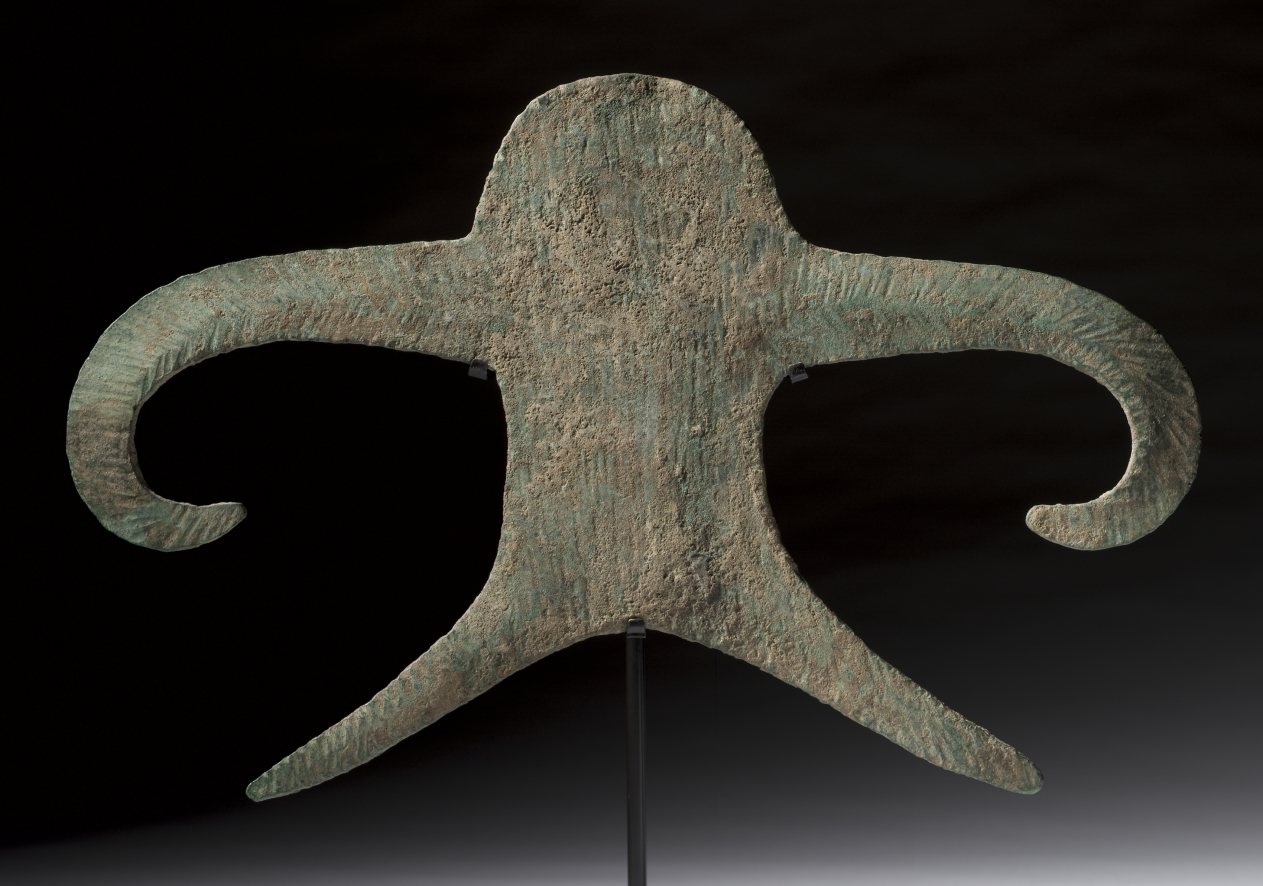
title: Anthropomorph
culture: India, Bronze Age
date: c. 1500–1000 BCE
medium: copper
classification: Sculpture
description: Among the few works of art known from the first millennium BC in India, anthropomorphs such as this fine example have an abstract formal appeal, but their meaning and function remain mysterious. They were made during the approximately 1,500-year long period of time between the protohistoric Indus Valley civilization, which flourished between about 2,800–1,800 BC, and the Maurya period (322–187 BC), when works of art must have been made in perishable materials that no longer survive.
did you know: Most of these mysterious objects were discovered in the plain regions of the Ganges and Yamuna Rivers of northern India.